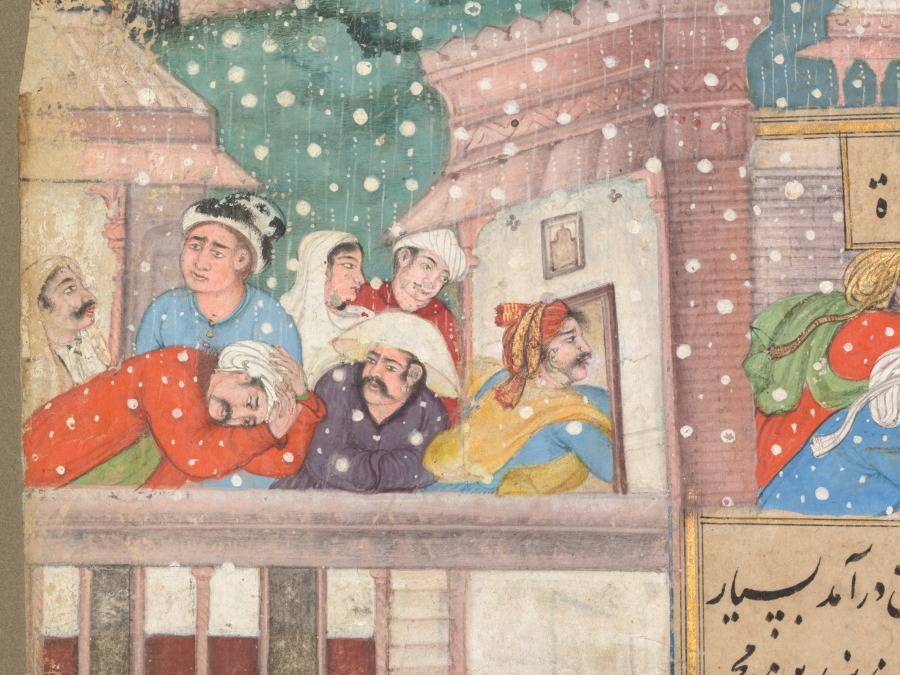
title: Page of disasters, from the Tarikh-i Alfi (History of the Thousand [Years])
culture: India, Mughal school, 16th century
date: c. 1595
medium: Gum tempera, ink, and gold on paper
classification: Painting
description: The 1,000th anniversary of Islam, according to the Hijri calendar followed by the Mughals and all Muslims, occurred during Akbar’s reign in 1592. He commemorated this milestone in many ways, including the commissioning of a new history of the Islamic world since the death of the Prophet Muhammad in 632. The episode discussed on this page took place during the 800s, when hailstorms beset Egypt and an earthquake hit Syria. The ruling caliph at the time was strongly prejudiced against Muslims who belonged to the Shi‘ite branch of Islam. Akbar seemed to be asking his artists to emphasize the natural disasters that took place, suggesting that they occurred as a result of the ruler’s intolerance.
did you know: Devastation after an earthquake includes a horse trapped under a fallen pavilion.